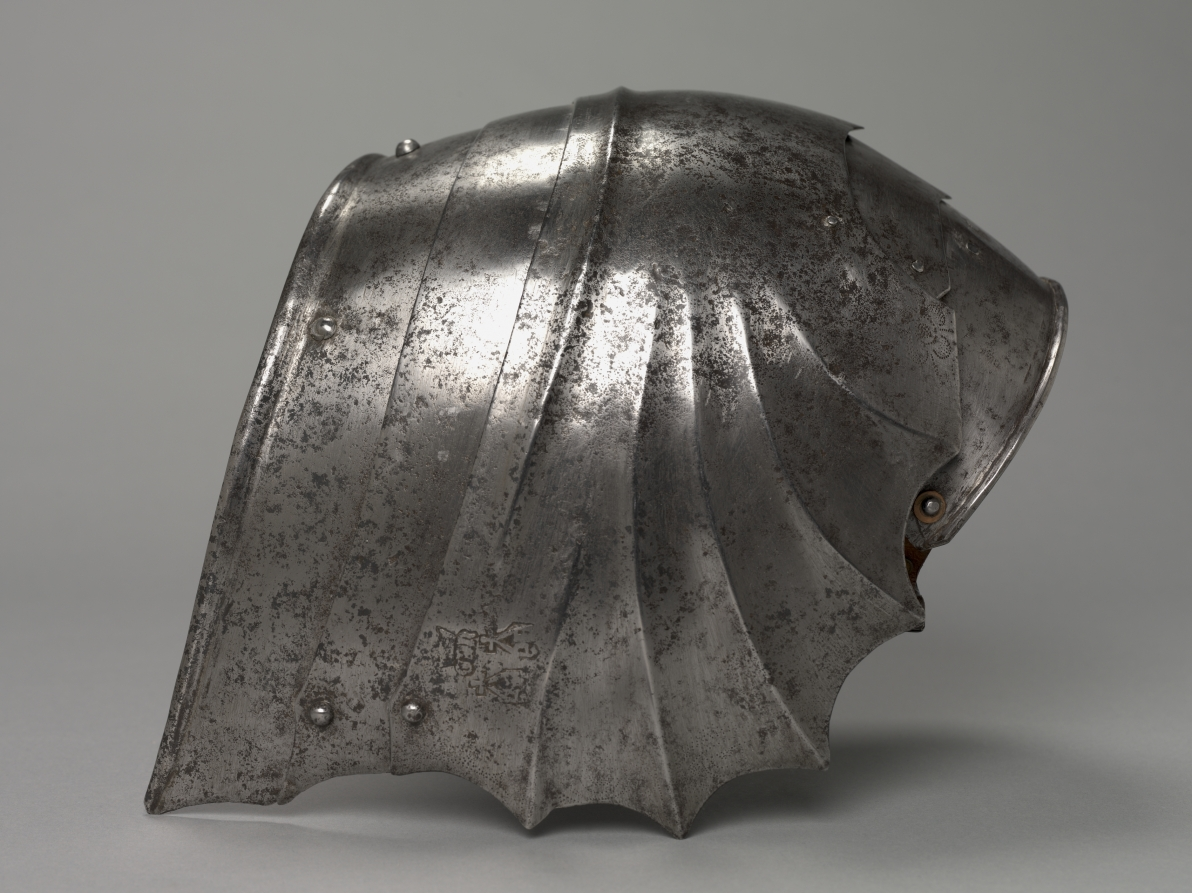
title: Gothic Fan-Shaped Pauldron (right)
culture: Italy, Milan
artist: Antonio Missaglia (Italian, 1416/17–1495/96)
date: c. 1485–1500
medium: steel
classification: Arms and Armor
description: When the elements that made up a suit of armor had been forged, shaped, and polished, they were inspected for fit and finish. At this stage the master armorer would use a punch to stamp each element with his maker's mark. Other associated marks might include a town or guild mark, depending on the city of origin. The set of three marks shown here are of a type known to be Milanese. The upper mark seems to show three letters beneath a crown, while the mark below, twice repeated, is a split cross with the letters inside. These probably refer to the Missaglias.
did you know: A pauldron is a component of plate armor that covers the shoulder and often the armpit, and parts of the back and chest as well.